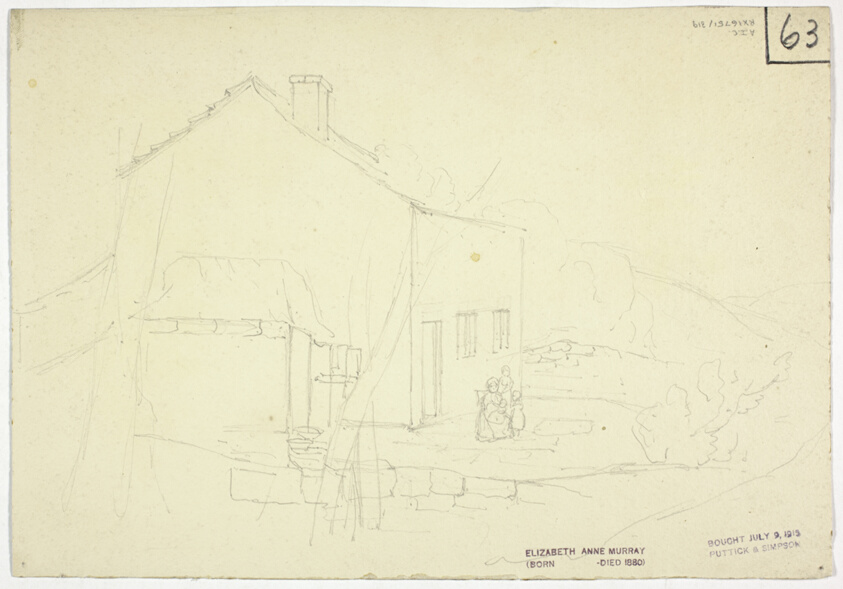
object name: Drawing and Watercolor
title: Scarborough (recto), and Sketch of House with Mother and Children (verso)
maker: Elizabeth Murray (English, c. 1815-1882)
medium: Watercolor over graphite (recto), and graphite (verso), on ivory wove paper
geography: England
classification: watercolor; drawings (visual works); prints and drawing